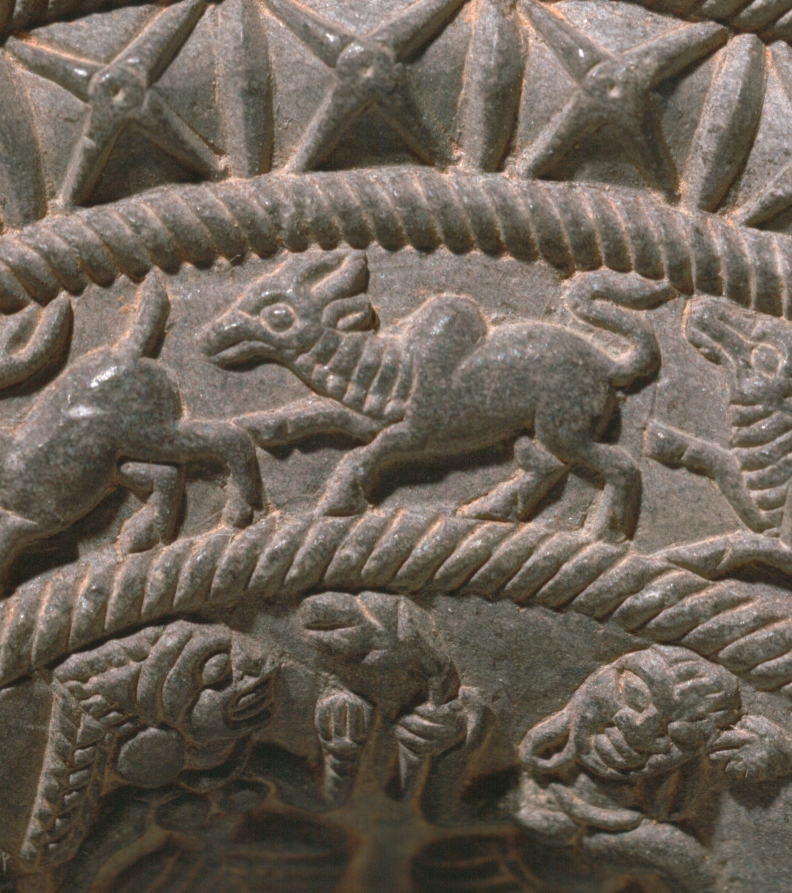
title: Ringstone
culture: India, Maurya period (322–185 BCE)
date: 200s BCE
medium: steatite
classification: Sculpture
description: Ringstones are among the earliest works of art to be created in stone during India's historical period. This example is finely carved with detailed images of affectionate couples and palm trees, running animals, and geometric motifs in concentric circles. The function of ringstones remains uncertain, since none of the surviving examples is inscribed or explained in a text.